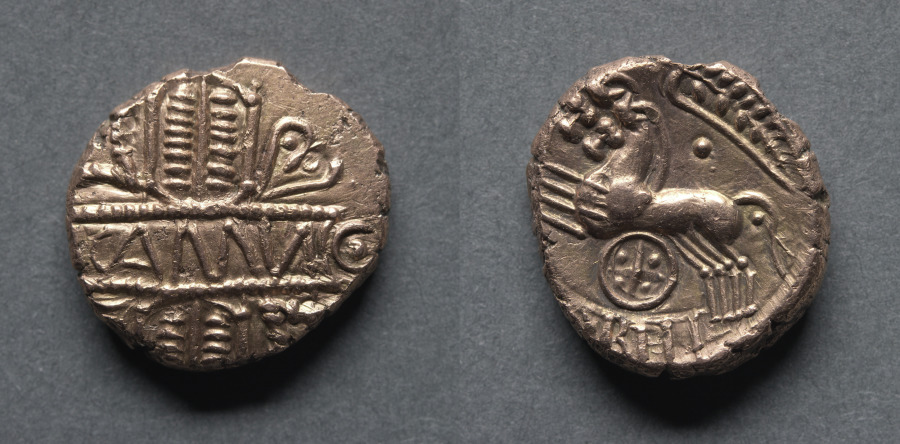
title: Cunobeline Stater: Tablet on Wreath (reverse); Two Horses and Wheel (reverse)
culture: England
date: c. 10–40 CE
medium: gold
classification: Coins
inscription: CAMVL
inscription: [CVNO]BELI[N]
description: Cunobeline is mentioned by various Roman historians. He was a powerful ruler, the son of Tasciovanus. He is known to have had one brother, Epaticcus, and possibly another, Sego, as well as two sons, Caratacus and Togodumnus. The history of this ancient time is very confused, particularly over family relationships; some of the sons and brothers may well have been sons-in-law and brothers-in-law. Cunobeline had his capital at Camulodunum, now Colchester. The workmanship of this extremely rare piece is remarkable in many ways. Study of the obverse shows that at least one of the V-shaped ornaments referred to by scholars is traditionally described as "heart" shape. In fact it is the little ivy leaf frequently found on Roman coins. The two well-executed, three-dimensional spirited horses on the reverse are unusual. One such animal is normally all the engraver of the period usually attempts. The wheel of the lost chariot is still present and the neat design of a leaf as an ornament is interesting. All this design detail serves to crowd off all but a few letters of the ruler's name. The CAMVL on the obverse makes this one of the earliest British native coins to state its mint town origin.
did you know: Cunobeline's name is derived from Common Brittonic Cunobelinos, which translates to "strong as a dog."